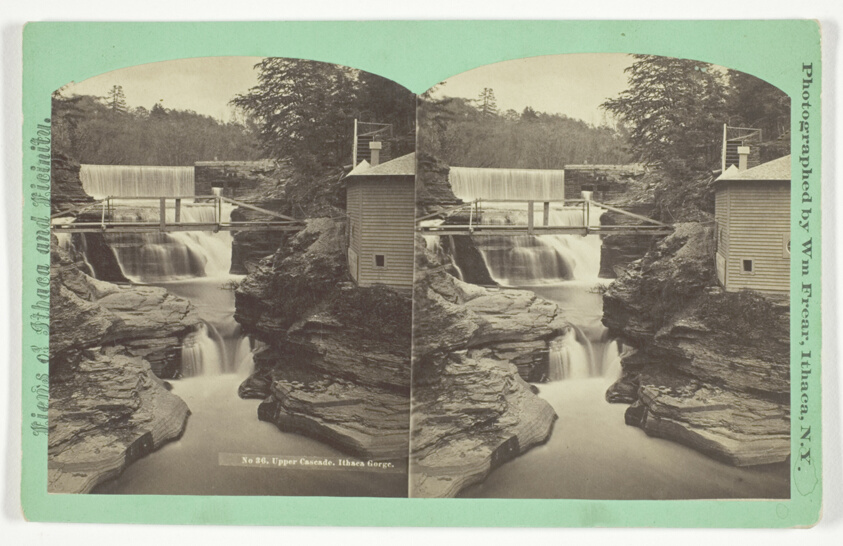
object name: Photograph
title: Upper Cascade. Ithaca Gorge, No. 36 from the series "Views of Ithaca and Vicinity"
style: 19th century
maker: William Frear (American, active late 19th century)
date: Late 19th century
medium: Albumen print, stereo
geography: Ithaca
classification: photography; photograph; albumen silver print; stereograph (albumen)